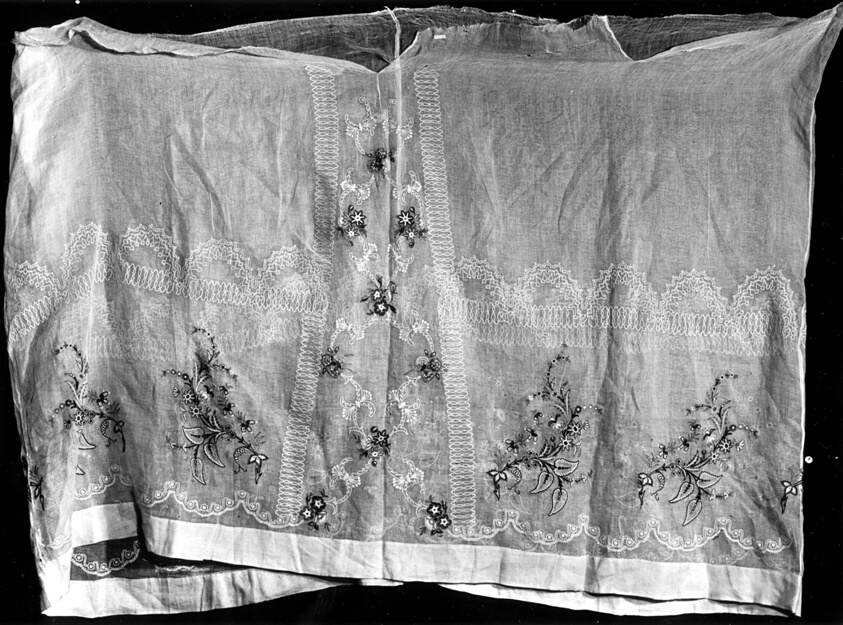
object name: Textile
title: Skirt (Fragment)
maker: France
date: 1850/60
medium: Cotton, plain weave; embroidered with wool and cotton threads in tambour stitch; floral design on border and front panel, white ground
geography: France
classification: textile; costume; needlework (visual works)